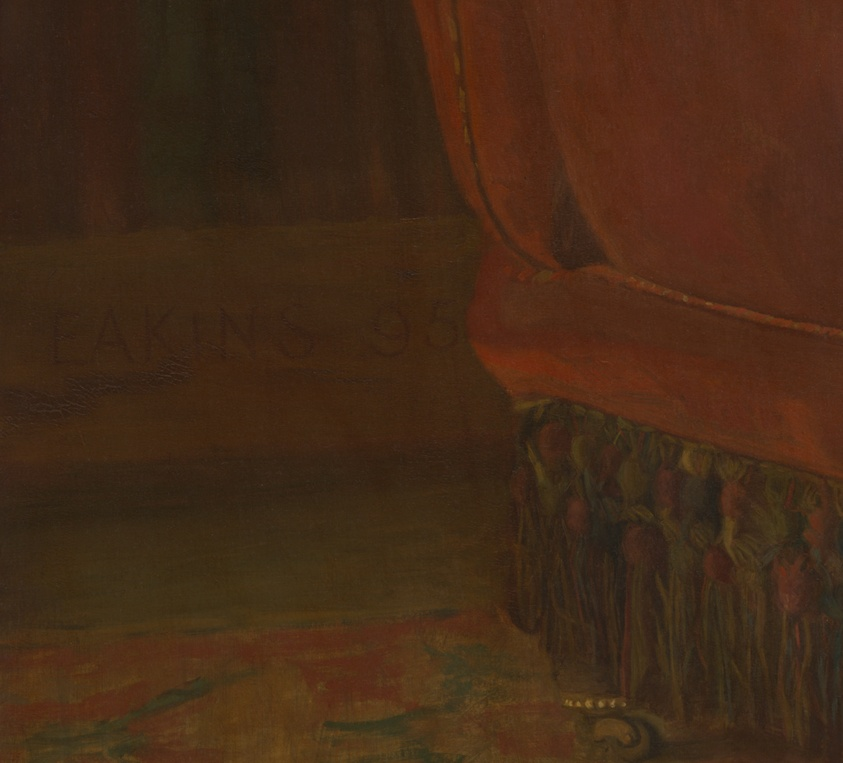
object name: Painting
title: Riter Fitzgerald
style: Realism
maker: Thomas Eakins (American, 1844–1916)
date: 1895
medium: Oil on canvas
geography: Philadelphia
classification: painting; american arts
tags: fashion, people, portraits